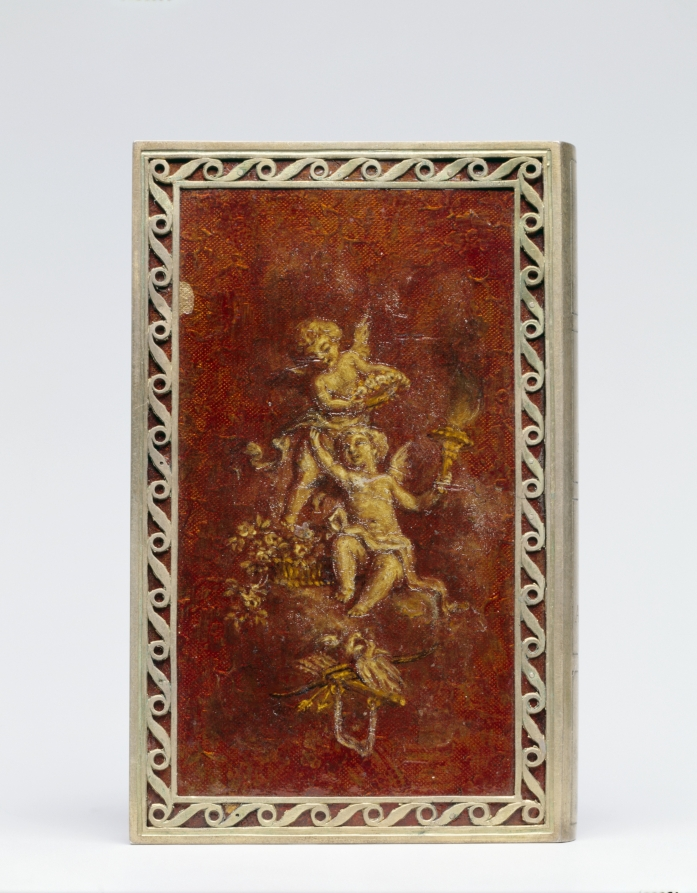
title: Box in the Form of a Book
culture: France, 19th century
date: 1800s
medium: brass with painted (lacquered ?) decorations; remains of gilding, especially inside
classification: Miscellaneous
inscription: engraved on spine: "L/ART/D/AIMER" (The Art of Love).